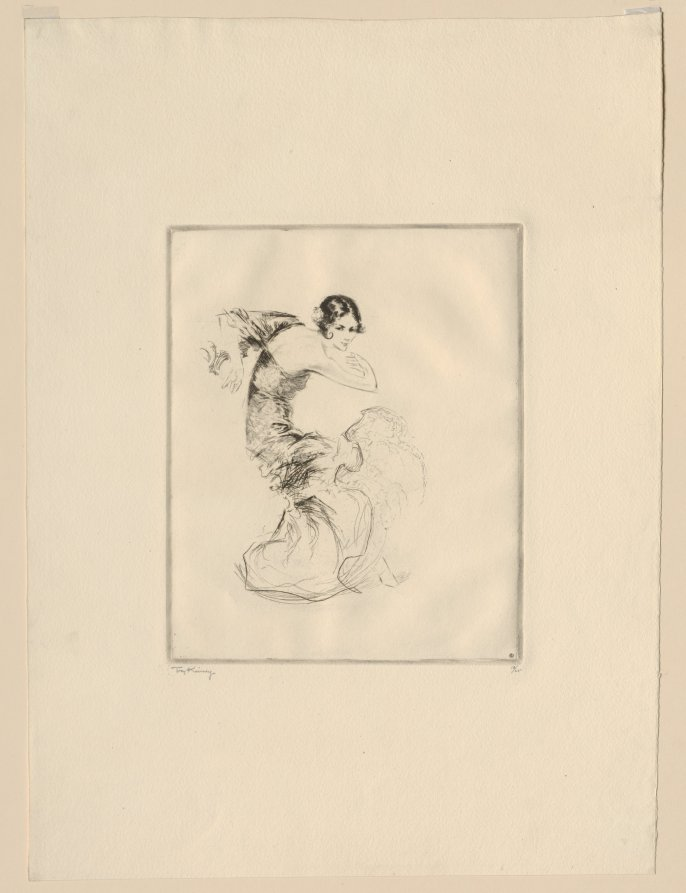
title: Pavlowa in "Carmen"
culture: America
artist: Troy Kinney (American, 1871–1938)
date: c. early 1900s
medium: etching and drypoint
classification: Print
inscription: Signed in pencil on bottom left beneath image: Troy Kinney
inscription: Marked in pencil on bottom right beneath image: 13/65